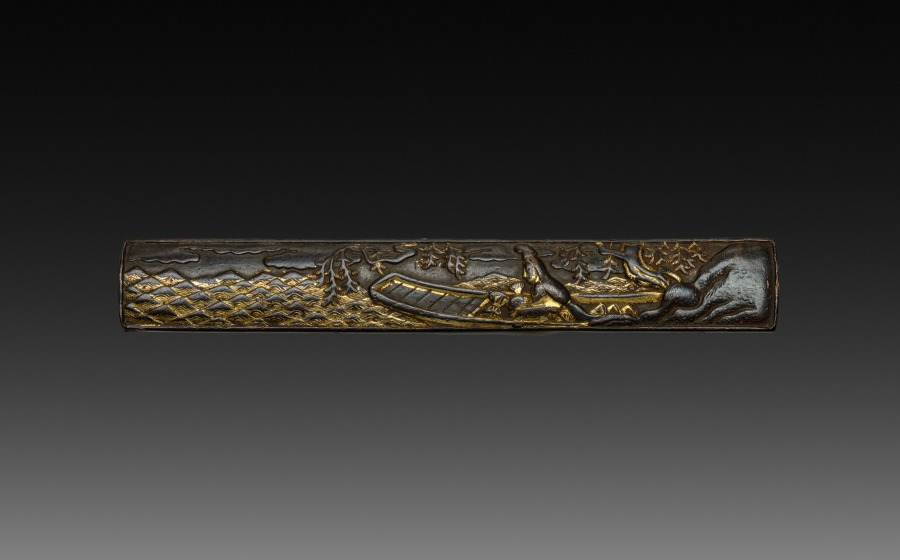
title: Knife Handle (Kozuka)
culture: Japan, Edo period (1615–1868)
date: c 1800s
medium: inlaid bronze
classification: Metalwork